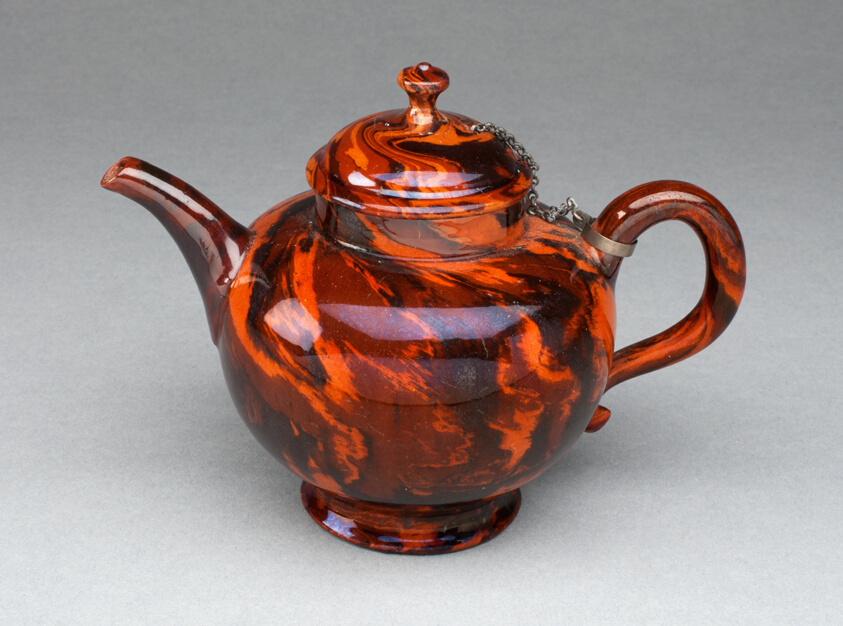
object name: Ceramics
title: Teapot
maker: Staffordshire, England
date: c. 1755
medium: Lead-glazed earthenware (agateware)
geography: Staffordshire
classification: teapot; agateware; lead-glazed earthenware; ceramics; earthenware; european decorative arts